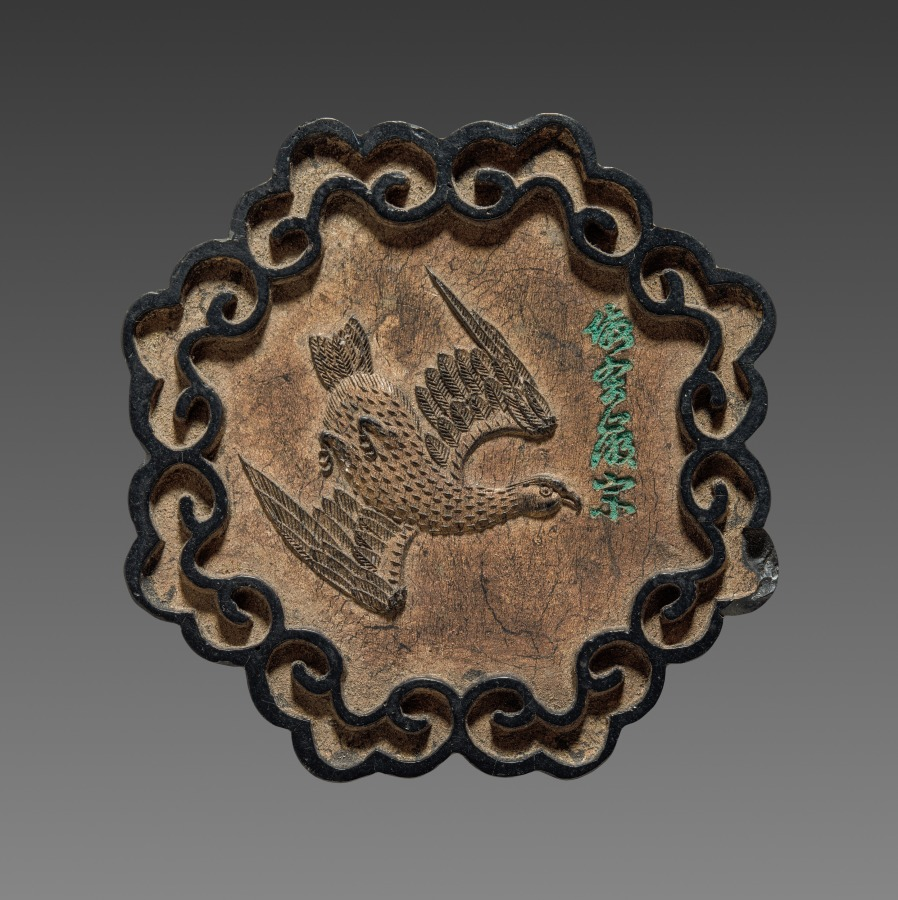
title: Ink Cake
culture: China, Qing dynasty (1644-1911)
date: 19th Century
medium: ink cake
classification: Miscellaneous